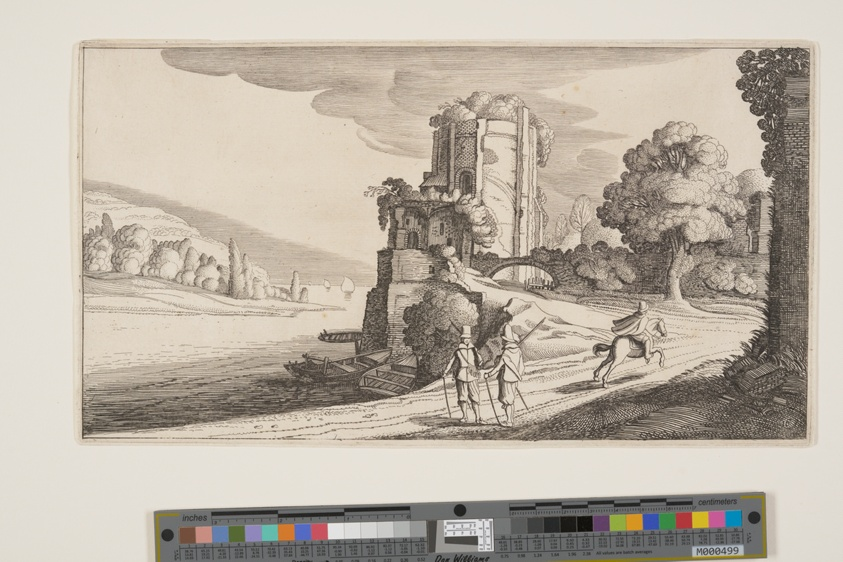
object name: Print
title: Round Tower on a River, from Landscapes (Playsante Lantschappen)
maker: Attributed to Claes Jansz. Visscher II (Dutch, 1586-1652); after Jan van de Velde II (Dutch, c. 1593-1641)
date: c. 1641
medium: Etching, with engraving, on ivory laid paper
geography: Netherlands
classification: etching; paper; print; prints and drawing